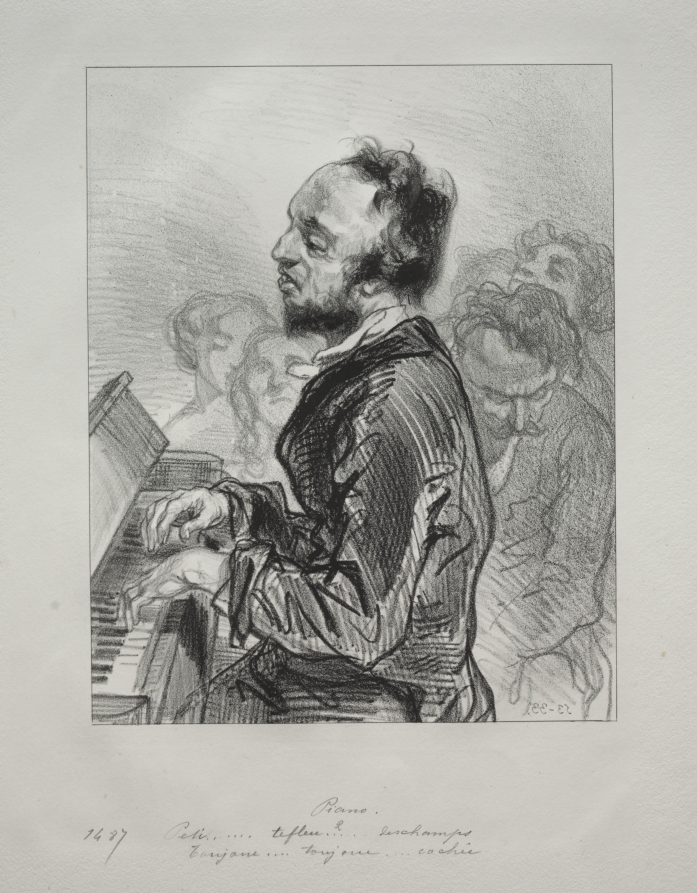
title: Piano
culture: France, 19th century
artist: Paul Gavarni (French, 1804–1866)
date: 1853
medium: lithograph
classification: Print